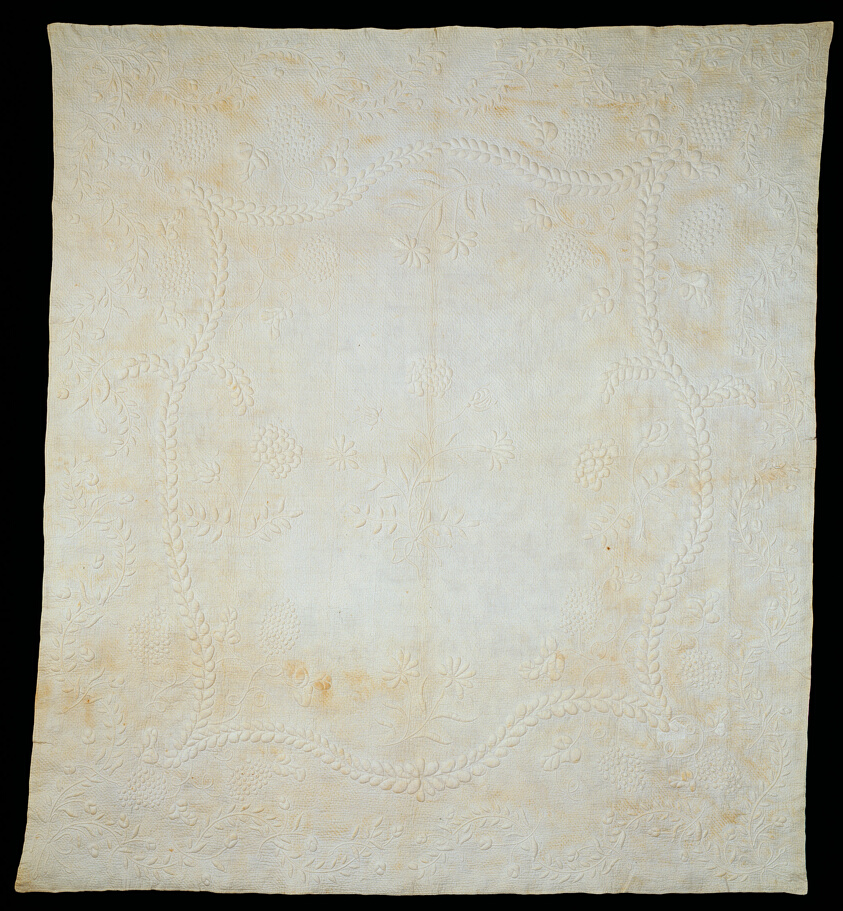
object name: Textile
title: Bedcover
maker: Sarah Stewart (American, 1823–1905); United States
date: 1830/1905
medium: Cotton, plain weave; quilted diagonally throughout; with additional three-dimensional quilting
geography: United States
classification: textile; needlework - quilt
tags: flowers, foliage, fruit, garlands